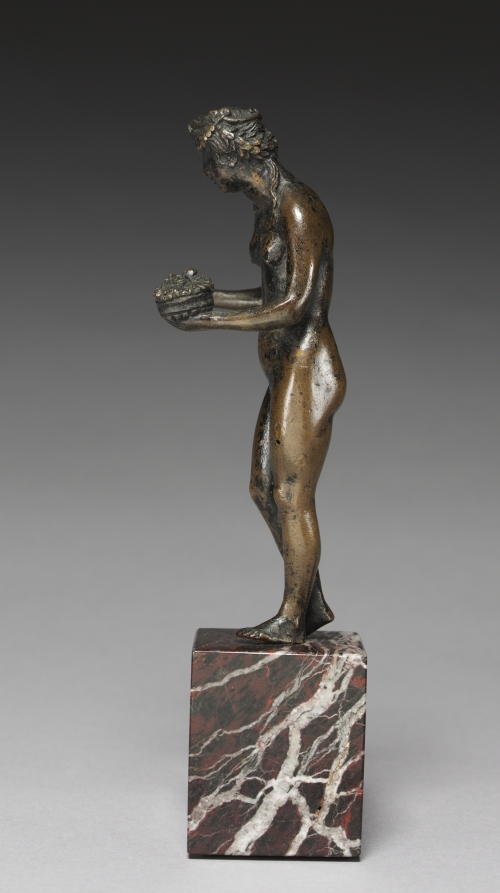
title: Pomona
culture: Italy, early 16th Century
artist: circle of Andrea Riccio (Italian, c. 1470–1532)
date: c. 1500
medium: bronze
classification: Sculpture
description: According to Roman mythology, the nymph Pomona cared for the gardens and forests, rejecting the pursuits of her suitors. The god Vertumnus fell in love with her. He disguised himself as an old woman, complimented her orchard and kissed Pomona passionately. As an old woman, Vertumnus explained that there was one person who loved both Pomona and her garden. Vertumnus then revealed himself to her, and from then on the two cared for Pomona's gardens together. Classicizing in style, Pomona stands nude with her weight on her left leg. She holds a bowl of fruit in her left hand while her right hand is clenched, suggesting it may have once held another object. Pomona wears a diadem, or headband, and hair decorated with a beaded garland falls in two locks over her shoulders. A hole has been drilled at the top of the figure's head for removal of the core and casting pins appear in the back of the right shoulder and on the front of the left leg. Other examples of this statuette exist in Oxford, Paris, Berlin and Washington. Only the Washington and Cleveland versions have been attributed to Riccio because of their superior quality of casting and the rich patinas.